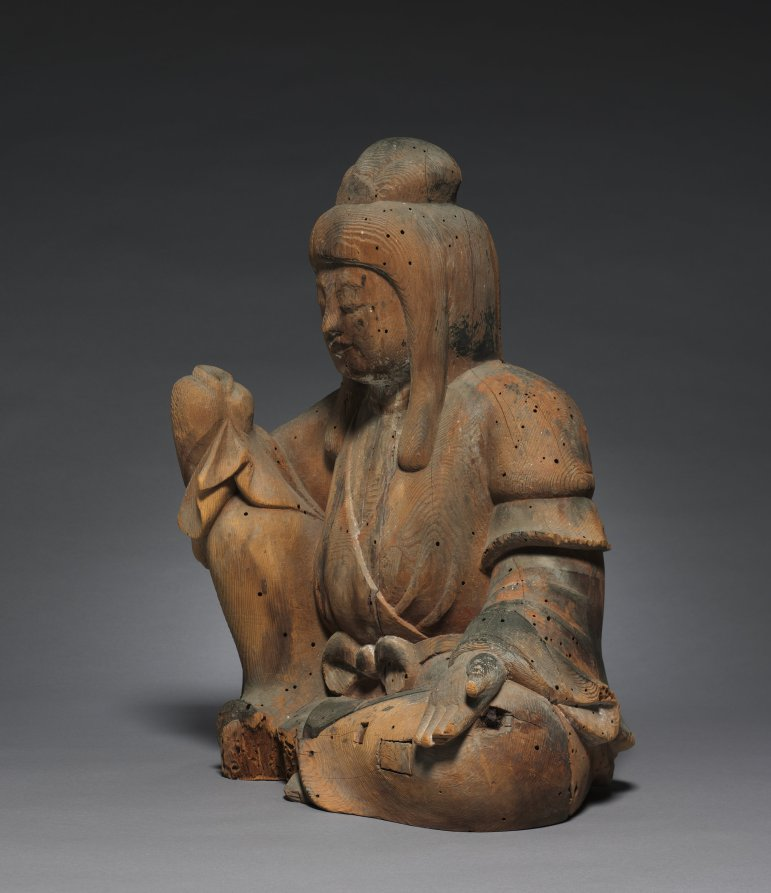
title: Shinto Deity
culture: Japan, Heian period (794–1185)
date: 900s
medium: wood, with traces of polychromy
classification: Sculpture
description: This sculpture represents a kami, the name for deities associated with the Japanese religious tradition called Shinto. It is said to have originally been created for the Usa Hachiman Shrine in Oita on the island of Kyushu. The shrine houses four main kami: Hime Okami, who assists those engaged in agriculture andsea travel; the legendary 5th-century emperor Ojin deified as the kami Hachiman; Empress Jingu; and the kami of Mount Kawara, who aids copper miners. The pose of this figure, dressed in robes reminiscent of a Tang dynasty court lady, suggests that she may have been an attending deity.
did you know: Traces of pigment on the surface of this sculpture indicate it was once painted.